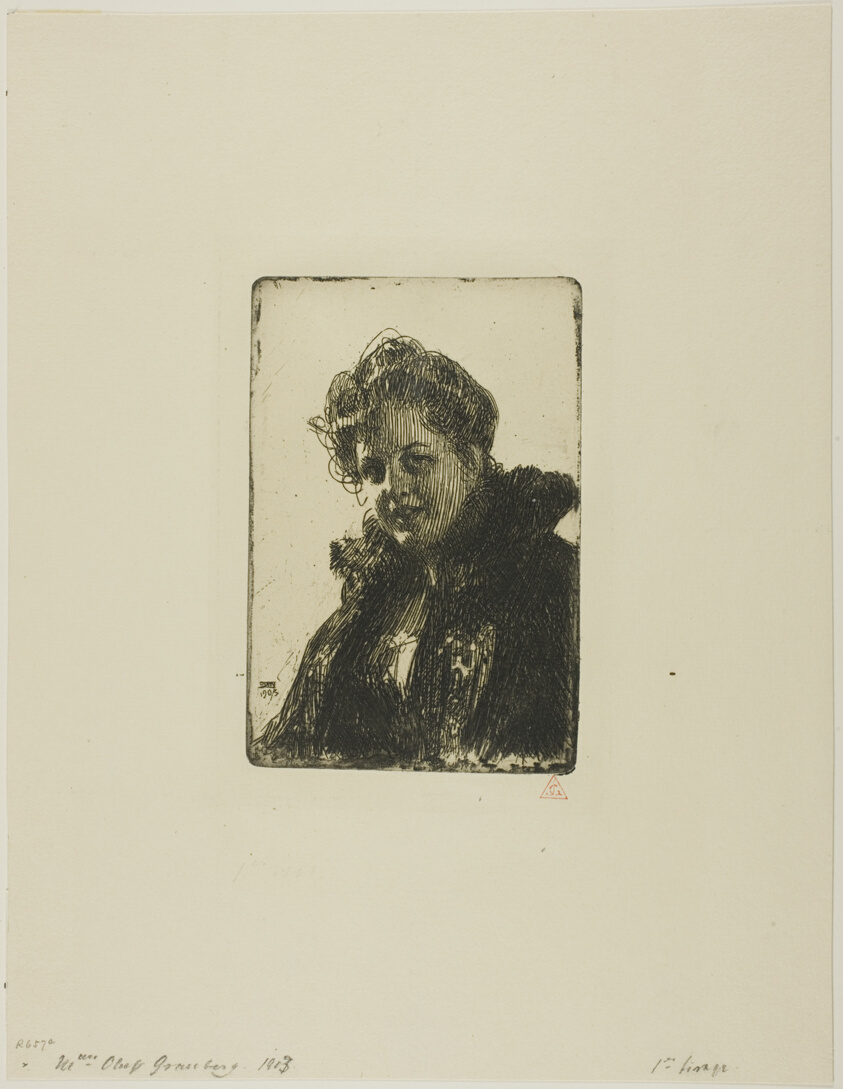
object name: Print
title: Mrs. Granberg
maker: Anders Zorn (Swedish, 1860-1920)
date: 1903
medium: Etching on ivory laid paper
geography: Sweden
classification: etching; print; prints and drawing